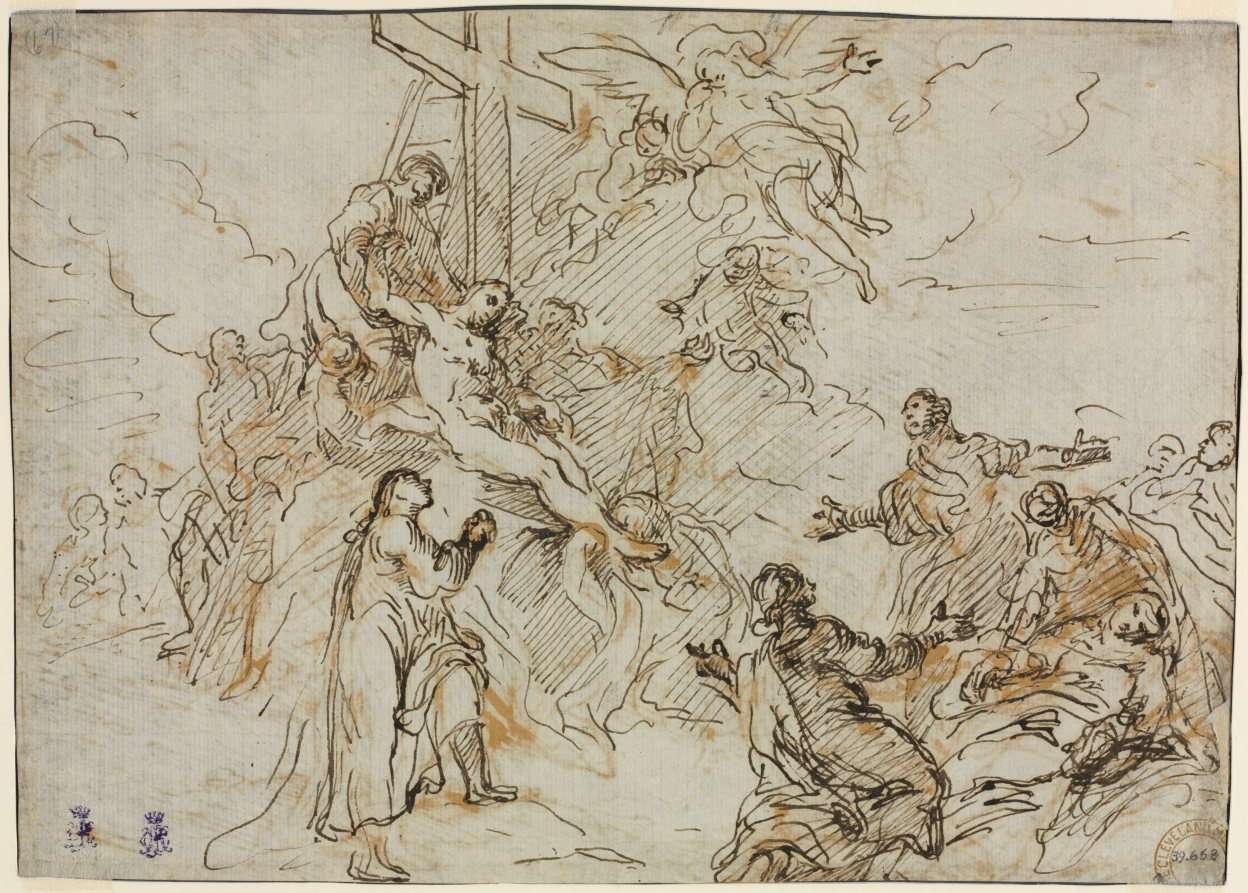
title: The Deposition (verso)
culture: Germany, 18th century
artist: Christian Wink (German, 1738–1797)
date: second half 18th century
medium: pen and brown ink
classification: Drawing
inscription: upper left, in graphite: 67 [circled]